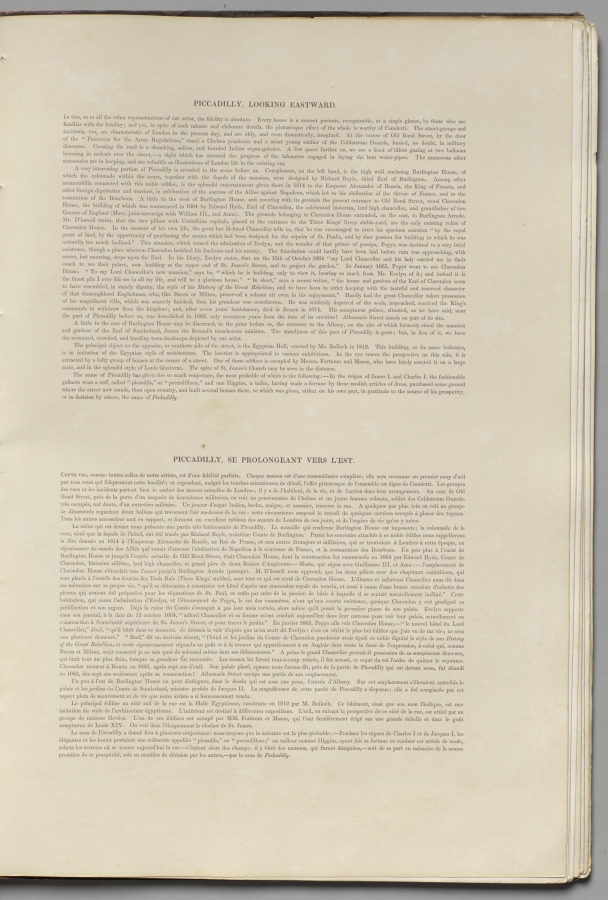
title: London As It Is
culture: England, 19th century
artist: Thomas Shotter Boys (British, 1803–1874)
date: 1842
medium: lithograph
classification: Bound Volume